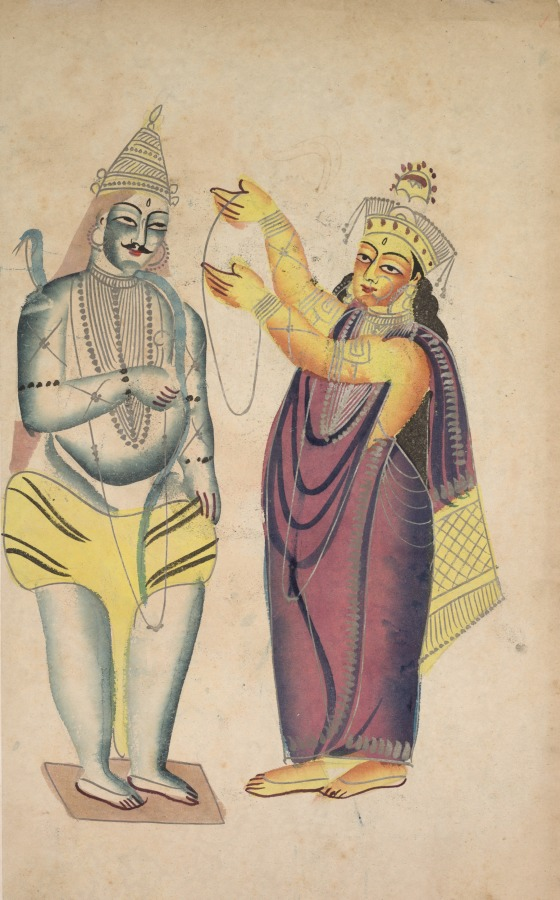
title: Parivati Placing a Wedding Garland on Shiva (verso)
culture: Eastern India, Bengal, Kolkata, Kalighat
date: c. 1890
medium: Gum tempera, graphite, ink, and tin on paper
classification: Painting